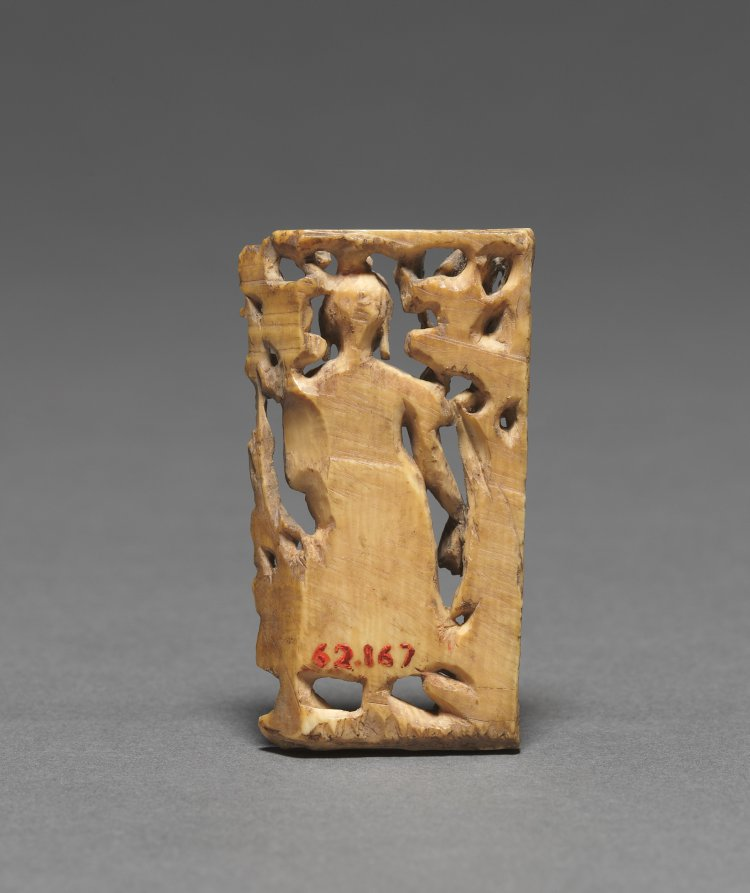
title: Walking Buddha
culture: India, Kashmir, 8th century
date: 700s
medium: ivory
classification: Ivory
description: Small, delicately carved ivory plaques were set into wooden shrines, carved with architectural motifs. This sculpted plaque would have once flanked a central seated Buddha, with a similar standing or walking Buddha on the opposite side. The pleated garment folds derived from Greco-Roman styles adopted in the ancient region of Gandhara, west of Kashmir, where this sculpture was made.